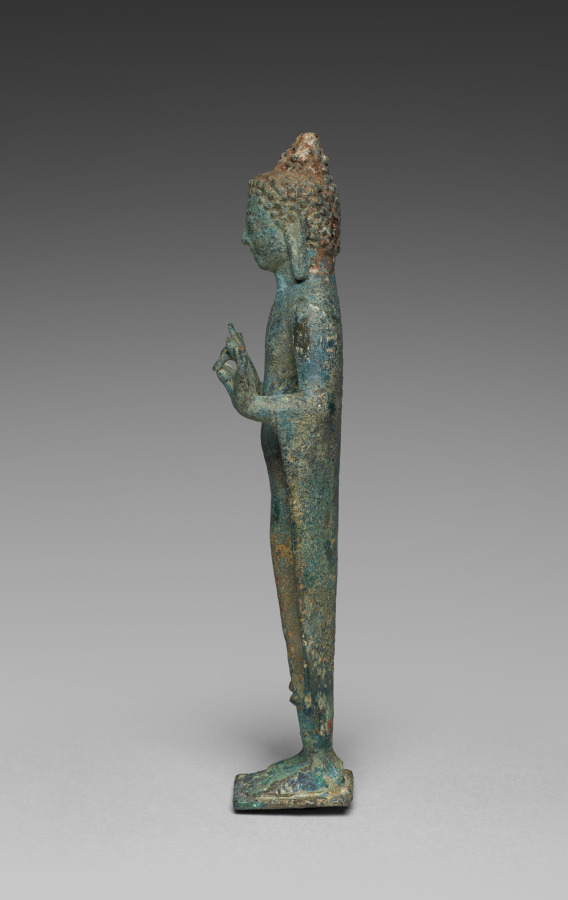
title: Buddha with Hands in Gesture of Teaching, Vitarka Mudra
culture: Thailand, Mon-Dvaravati period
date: 600s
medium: bronze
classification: Sculpture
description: Made during the early phase of Buddhist art production in mainland Southeast Asia, this Buddha wears a plain robe that indicates the artist's awareness of images made at the workshops of Sarnath, on the Ganges River in India. The hem of the lower garment, worn under the monk's robe, elegantly crosses the ankles, and the subtle line at the waist shows where it is secured.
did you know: Bronze sculptures in Thailand were made by sculpting clay around an iron armature; the clay core remains inside.